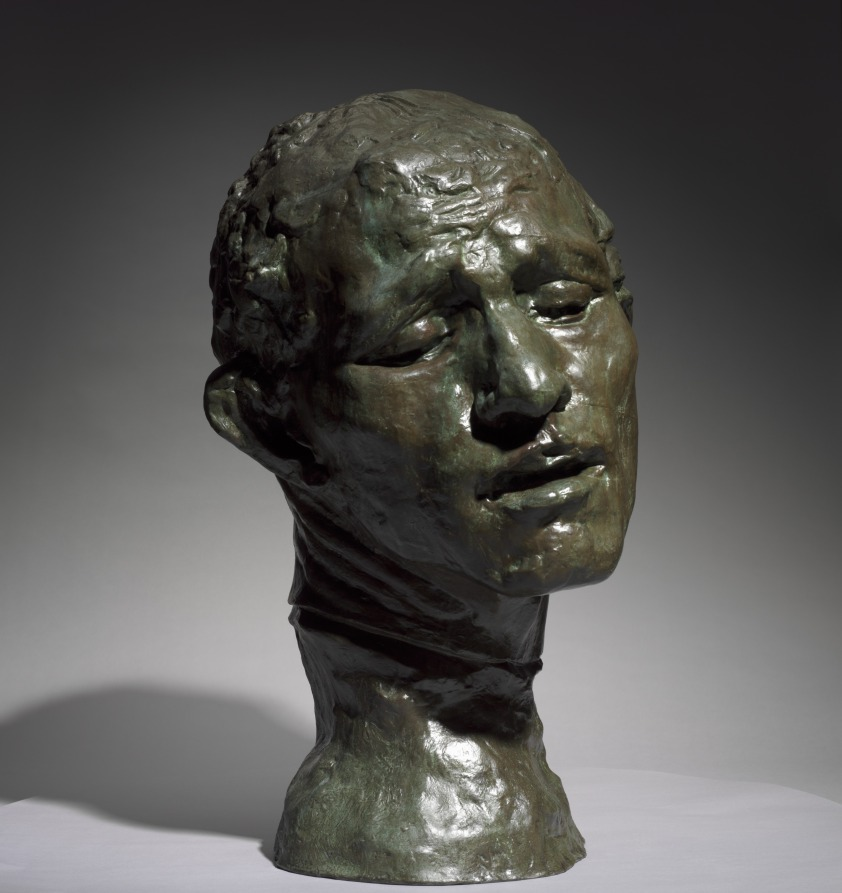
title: Heroic Head of Pierre de Wissant, One of the Burghers of Calais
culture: France, 19th century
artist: Auguste Rodin (French, 1840–1917)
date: 1886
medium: bronze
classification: Sculpture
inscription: inscribed at neck, left: A.Rodin; inscribed lower back: Alexis Rudier/Fondeur-Paris.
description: This sculpture depicts one of the figures in Rodin’s large public monument The Burghers of Calais (1884–89), featuring six French men who volunteered to be taken prisoner by the English in exchange for lifting the siege of Calais during the Hundred Years War (1337–1453). Pierre de Wissant’s anguished expression suggests extreme mental suffering as he contemplates his expected execution. Rodin exhibited a life-size version of the figure as an independent work before completing the monument. He later made multiple versions in various sizes and media.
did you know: This sculpture depicts the head of a figure from Rodin's large public monument The Burghers of Calais (1884-89). The CMA also owns a plaster version of the head.